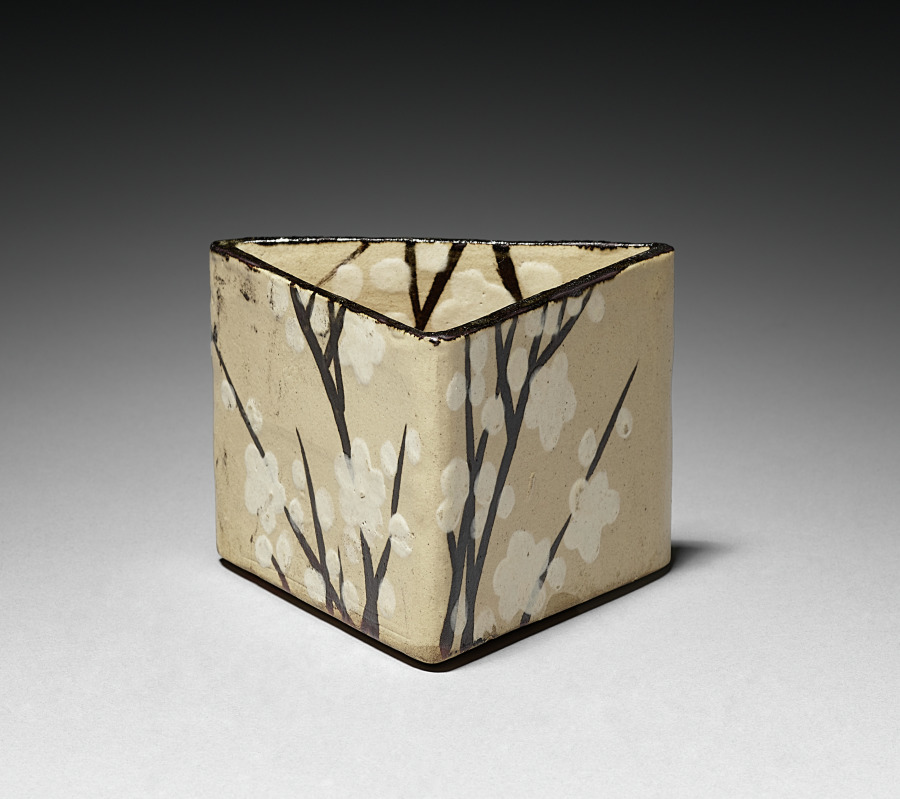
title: One of Five Serving Bowls (Mukozuke) with Prunus Design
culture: Japan, Edo period (1615–1868)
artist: school of Ogata Kenzan (Japanese, 1663–1743)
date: 1700s-1800s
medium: Kyoto Ware: stoneware with underglaze iron oxide and slip decoration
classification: Ceramic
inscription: signature on bottom, 3 characters in brown iron.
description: Note the rough, tan, clay bodies of these bowls with their deliberate irregularities. The design of branches was first painted in a black iron oxide, then the blossoms and buds in a white slip, followed by the application of a very thin transparent overglaze.